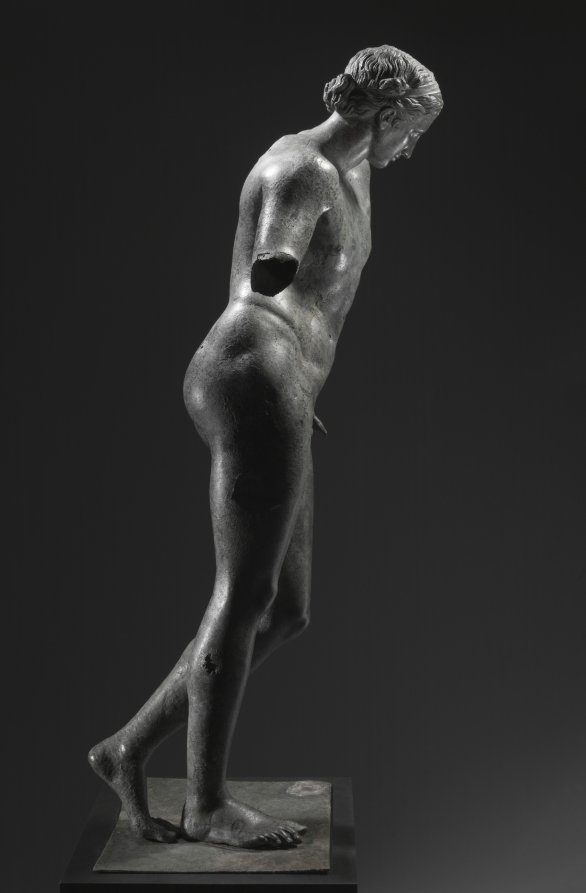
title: The Cleveland Apollo: Apollo Sauroktonos (Lizard-Slayer) or Apollo the Python-Slayer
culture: Greece, Athens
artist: attributed to Praxiteles (Greek, Athenian, c. 400–330 BCE)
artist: or Follower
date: c. 350–200 BCE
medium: bronze, copper, and stone inlay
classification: Sculpture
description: The Cleveland Apollo has been called both Lizard-Slayer (Sauroktonos) and Python-Slayer. The first name comes from the Roman author Pliny the Elder (23–79 CE), who noted in describing bronze works made by the Athenian sculptor Praxiteles (active around 370–330 BCE), “the youthful Apollo [is] known as the Sauroktonos because he is aiming an arrow at a lizard [Greek sauros] which is stealing toward him.” Scholars have long connected this description with artworks showing the young Greek god Apollo in a distinctive pose and hairstyle, standing on his right leg and leaning to his left. In more completely preserved versions, Apollo reaches toward a tree with his left arm and seems to take aim at a lizard. The Cleveland Apollo shows the adolescent god similarly posed and coiffed, making it an important addition to the Apollo Sauroktonos group—the only surviving large-scale bronze sculpture of the type. The young Greek god Apollo, identifiable by his distinctive hairstyle and pose, stands on his right leg and leans to his left, probably toward a now-lost tree. Although now separated, the left forearm and hand survive, together with an unusual lizard-like creature, perhaps drawn from the world of myth. A flat bronze base also remains, though it may be a later adaptation. A tree or other support has been lost, probably smaller than in the marble versions. Given its material and very high artistic quality—note the lifelike hair, fingernails, and inlaid copper lips and nipples—more than one scholar has suggested that the Cleveland Apollo could be the very sculpture seen by Pliny. Some have called the sculpture “Python-Slayer,” seeing the oddly shaped serpentine creature with asymmetrical legs as the mythical Python killed by Apollo in establishing his sanctuary at Delphi. But technical details may explain some of the asymmetry, and no other specific evidence connects it to Delphi. Most scholars would retain the name Sauroktonos (Lizard-Slayer) for the Cleveland Apollo, even as some debate whether it was made by Praxiteles himself or a later follower.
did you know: The Cleveland Apollo is the only surviving large-scale bronze sculpture of its type, Apollo Sauroktonos (the Lizard-Slayer).